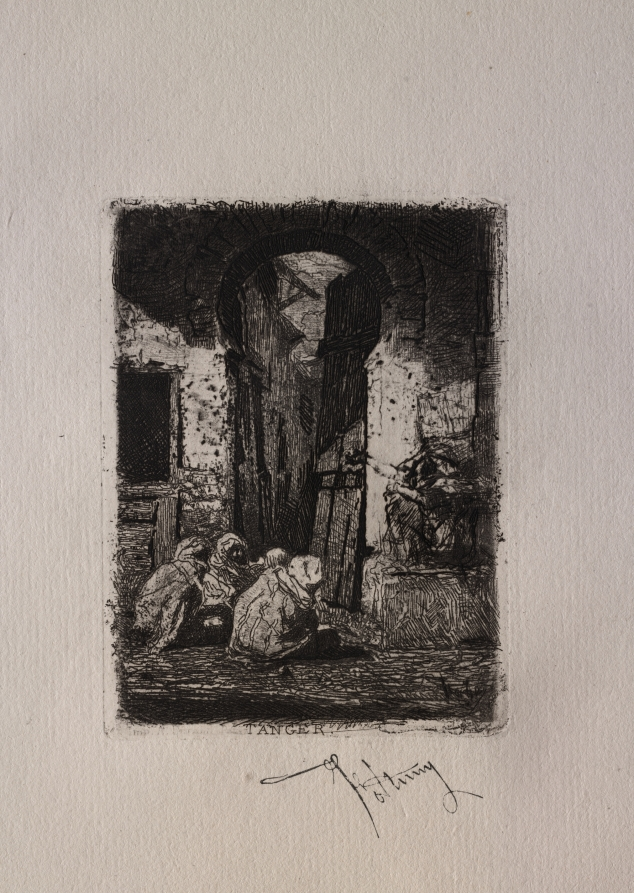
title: Tangiers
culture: Spain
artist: Mariano Fortuny (Spanish, 1838–1874)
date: 1861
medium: etching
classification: Print